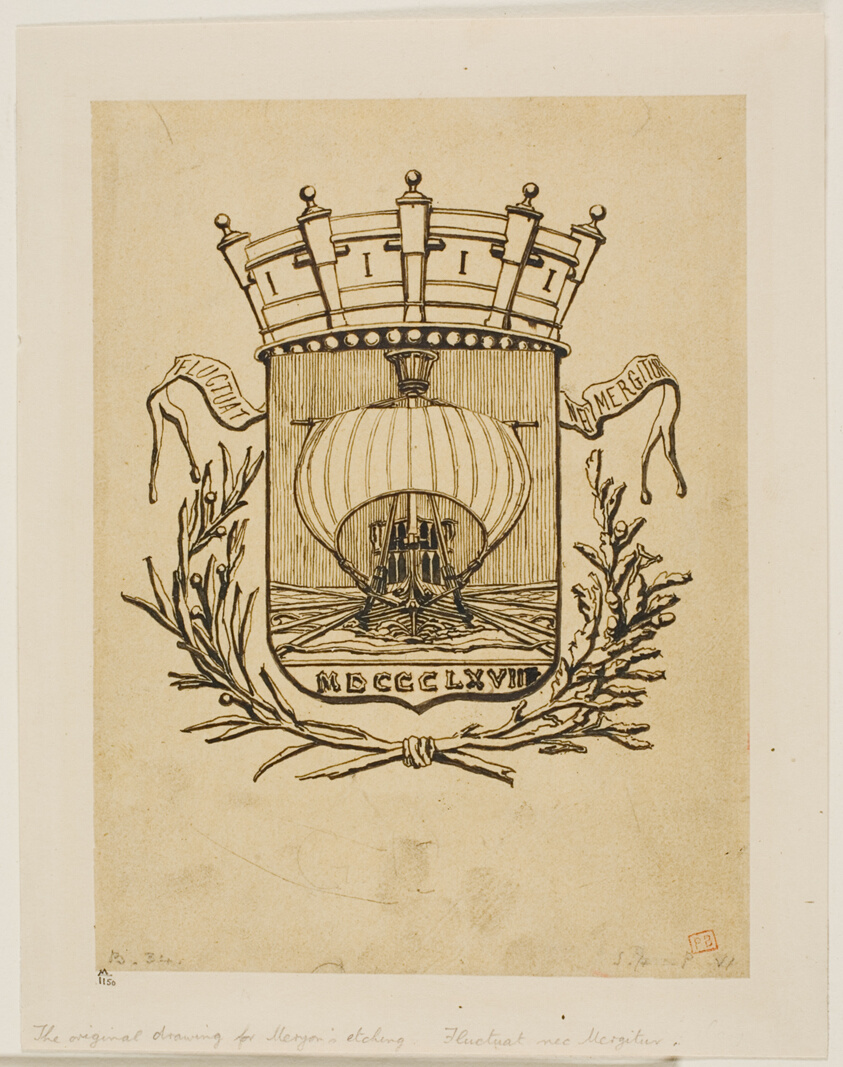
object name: Drawing and Watercolor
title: It Rocks but is Not Sunk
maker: Charles Meryon (French, 1821-1868)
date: 1854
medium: Pen and brown ink on tan wove China paper, laid down on ivory wove paper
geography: France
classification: pen and ink drawings; drawings (visual works); prints and drawing